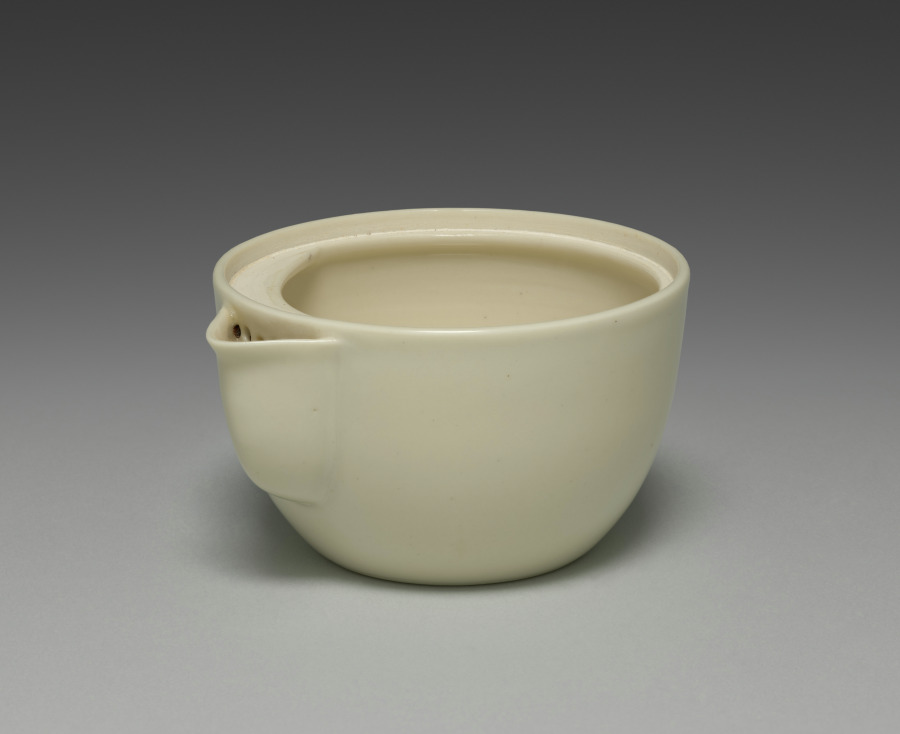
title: Hand-held Teapot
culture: Japan, Meiji period (1868–1912)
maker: Seifū Yohei III (Japanese, 1851–1914)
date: 1893–1914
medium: Porcelain with molded and carved design and cream glaze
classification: Ceramic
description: This teapot is of a variety used by advanced sencha practitioners. Called a hōhin, the pot is designed to be held directly by the fingers, with the body touching the upper part of the palm. This shape allows the host to manipulate the pot with a single hand and demonstrate dexterity. Direct contact between the ceramic body and the hand allows the host to closely gauge the temperature of the water within. There are differing grades of sencha, and for the finest one, gyokuro, the water temperature must be carefully regulated to achieve the proper flavor. This vessel is therefore efficacious for preparing this high-quality tea. The hōhin is also extremely portable, so it is well suited for impromptu gatherings. According to its box, this teapot is an example of taihakuji. “Great-white porcelain” was an important early invention Yohei III devised in 1972. It involved the combination of a distinctive translucent, creamy glaze over an ivory-colored clay body.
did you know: This pot’s restrained design includes on the lid’s handle a yin-yang motif, symbolizing the ideal balance between the forces of the universe.